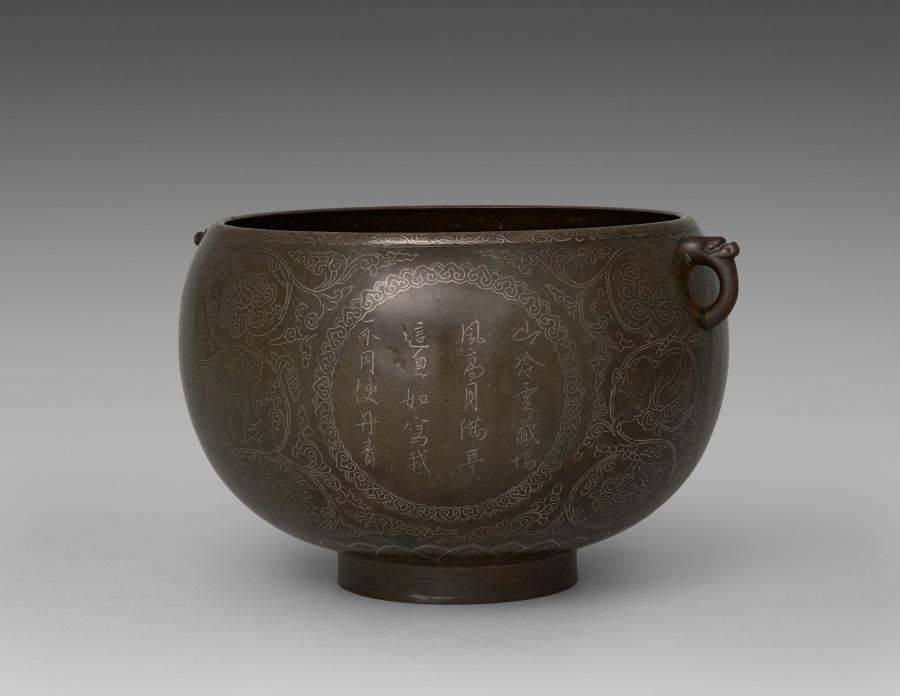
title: Basin with Inscribed Figures and Calligraphy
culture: Korea, Goryeo dynasty (918–1392)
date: 1100s–1200s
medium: bronze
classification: Metalwork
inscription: Each of the three roundels contain five-character, four-line poems with Buddhist messages.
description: This bronze basin may have been used for containing purified water. What makes this work charming is its intricate decoration done in silver inlay: the five-character, four-line poems interspersed among images of a child. The poems, which evoke the concept of nonattachment and nonduality, were written by Buddhist monks.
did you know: A child, one of the main decorative elements for this basin, is possibly a young Buddhist pilgrim named Sudhana, who took a long spiritual journey to search for enlightenment.